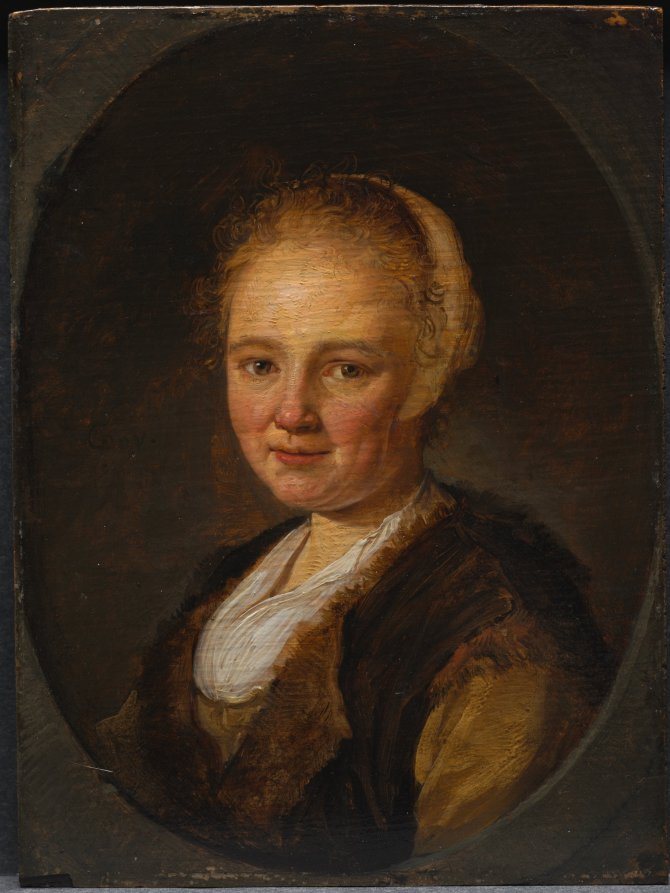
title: A Young Woman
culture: Netherlands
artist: Gerrit Dou (Dutch, 1613–1675)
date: 1640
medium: oil on wood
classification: Painting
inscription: Signed left center: "GDov."; "[GD in monogram]"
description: This painting may depict a specific person as in a traditional portrait. The less formal costume and the tight focus on the head, however, may mean that it is a tronie, a popular category of painting among Dutch painters in the 1600s. While painted from living models, tronies represent more general types of people, designed as beautiful images rather than accurate likenesses of people known to their patrons.